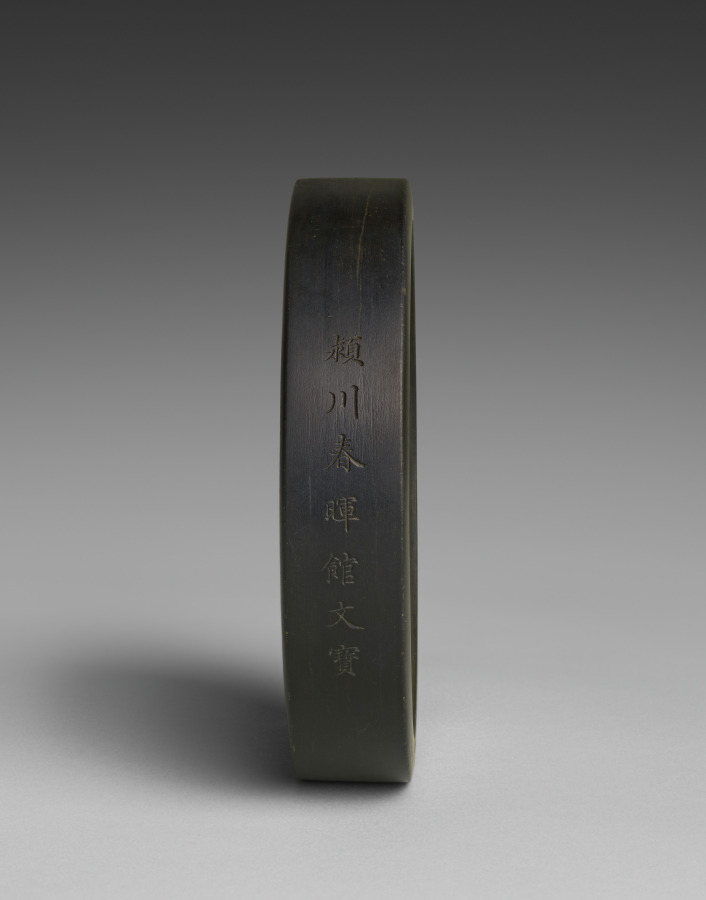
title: Inkstone in the Shape of a Roof Tile with Seal Script Characters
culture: China, Qing dynasty (1644–1911)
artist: Workshop of Jian Guzhai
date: 1700s–1800s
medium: She stone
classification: Stone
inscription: 七葉永祥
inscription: 「鑑古齋仿製」 「穎川春暉館文寶」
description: This inkstone is particularly noteworthy for its inscriptions in two styles. The base shows four characters in seal script (zhuanshu) expressing auspicious, or favorable wishes, while the characters on the side in standard script (kaishu) record the name of the workshop and that of the collector’s studio. Inkstones were used to grind solid ink cakes with the addition of water to produce liquid ink for brush painting and calligraphy.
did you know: The four large seal script characters on the base of this inkstone, 七葉永祥, may be read as "eternal good fortune for seven generations."